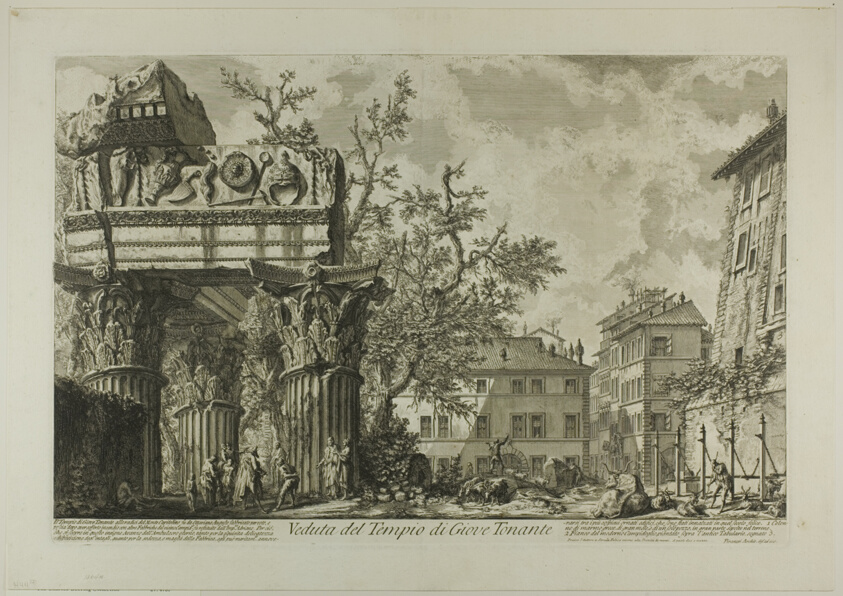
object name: Print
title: View of the Temple of Jupiter Tonans [Jupiter the Thunderer], from Views of Rome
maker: Giovanni Battista Piranesi (Italian, 1720-1778)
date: 1750/59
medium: Etching on heavy ivory laid paper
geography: Italy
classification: etching; print; prints and drawing